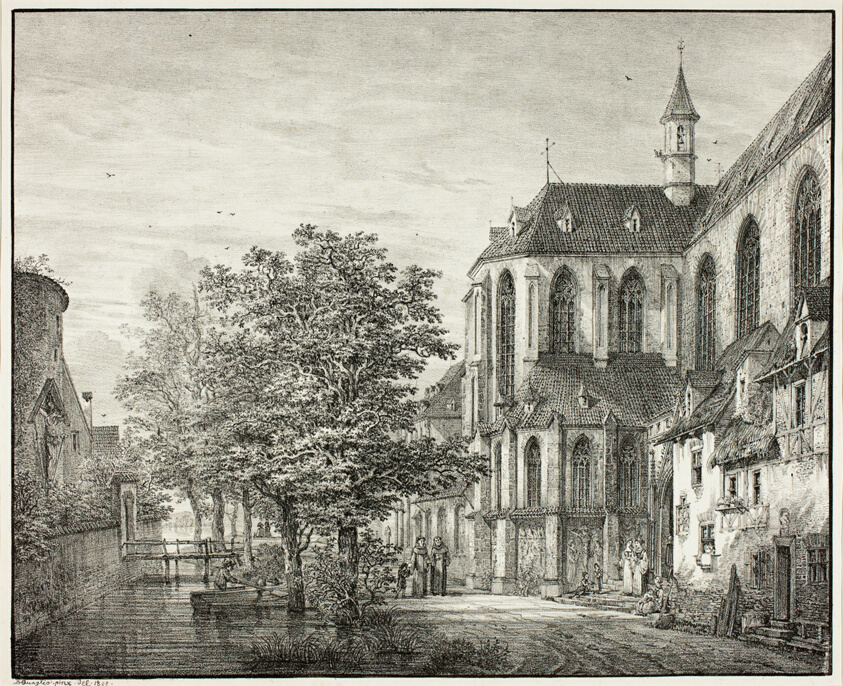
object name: Print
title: Parish Church at Boppard on the Rhine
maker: Domenico Quaglio II; German, 1787-1837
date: 1822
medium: Lithograph in black on ivory wove paper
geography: Germany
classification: lithograph; print; prints and drawing